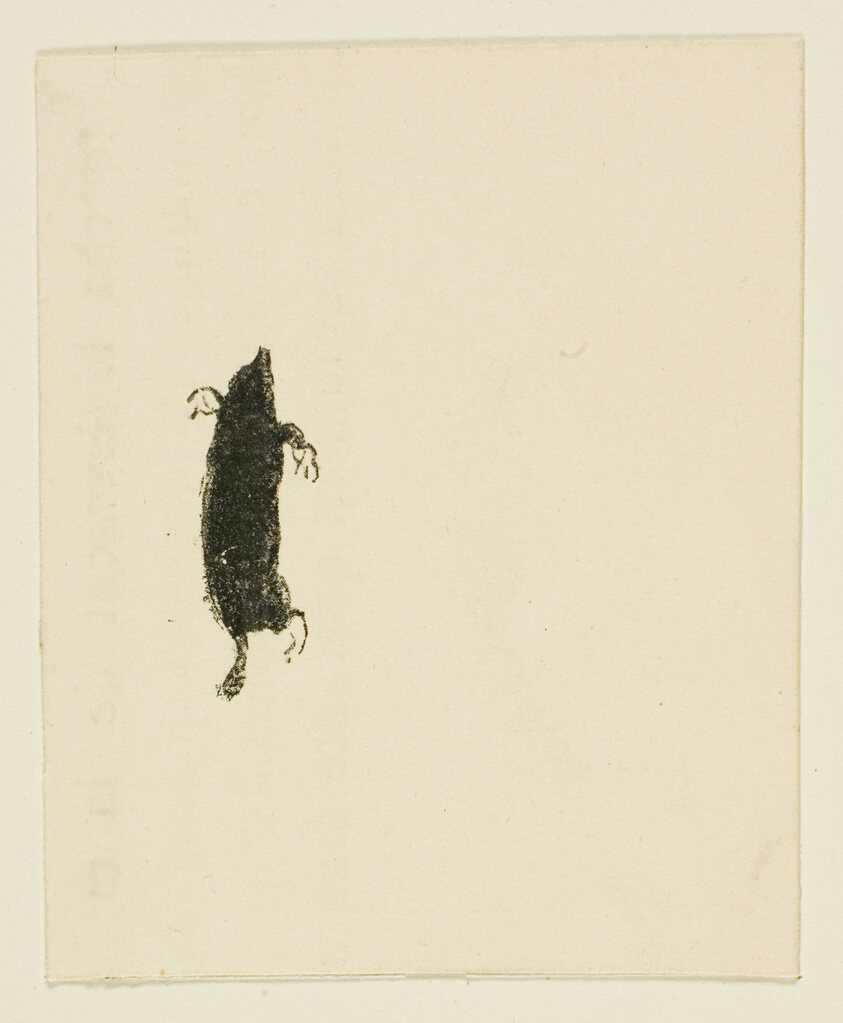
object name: Print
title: Tailpiece from Au Pied du Sinaï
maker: Henri de Toulouse-Lautrec (French, 1864-1901)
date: 1897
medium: Reproduction of a lithograph on cream wove paper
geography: France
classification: print (reproduction); prints and drawing; print